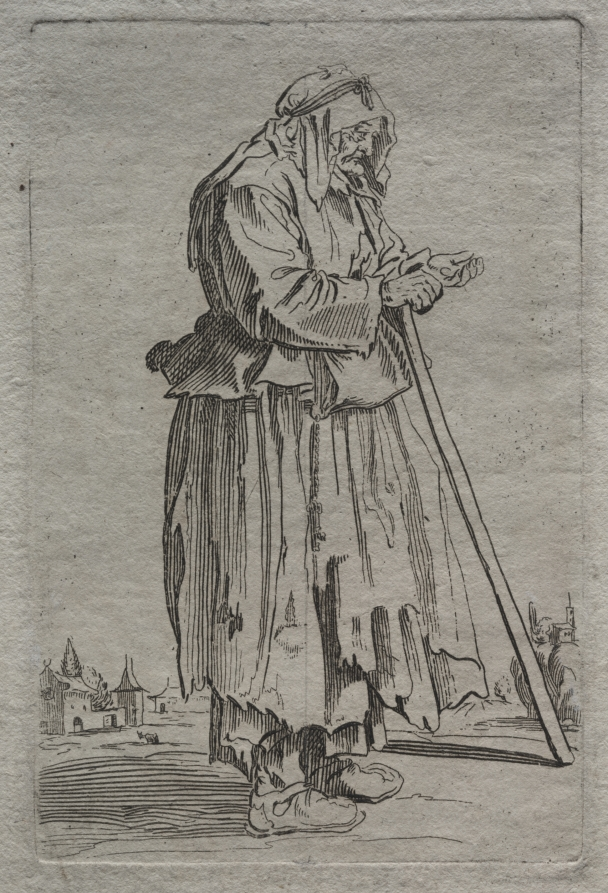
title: Old Beggar Woman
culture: France, 17th century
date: 1600s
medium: etching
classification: Print